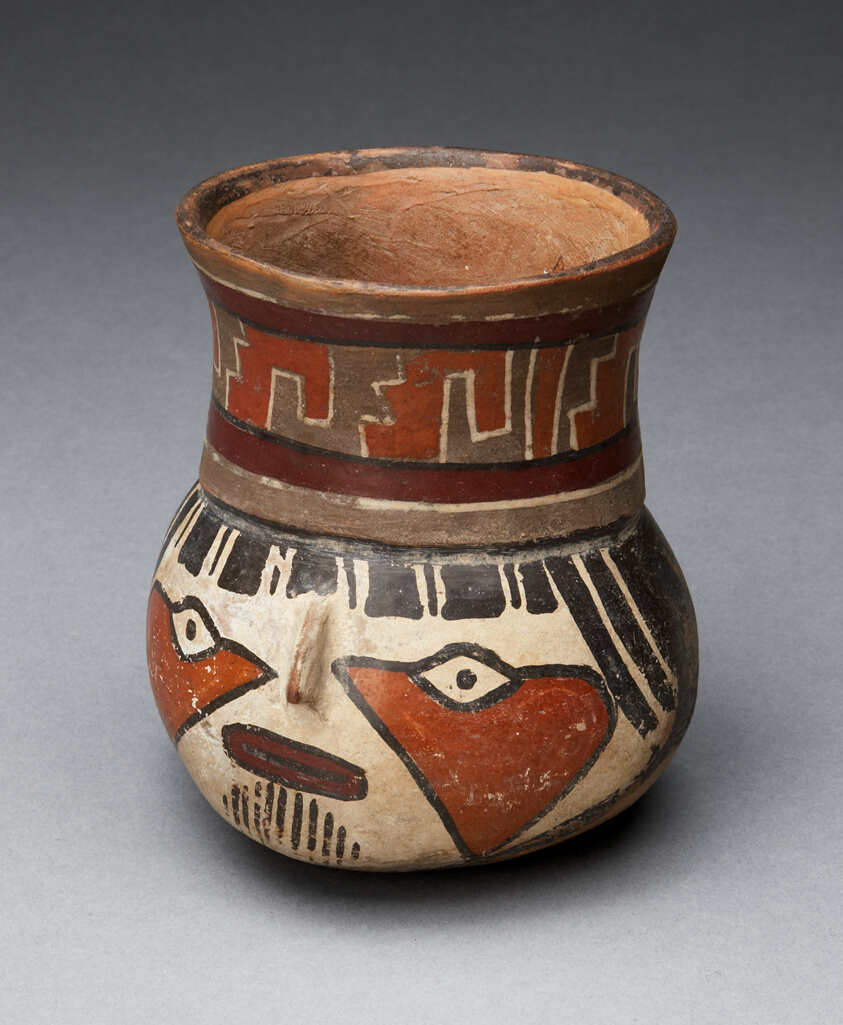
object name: Vessel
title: Jar Depicting a Head with Face Painting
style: nazca, early intermediate period, Pre-Columbian, americas, Arts of the Americas, andean, andes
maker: Nazca; South coast, Peru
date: 180 BCE–500 CE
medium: Ceramic and pigment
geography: Nazca Valley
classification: earthenware; art of the americas; ceramics; vessel